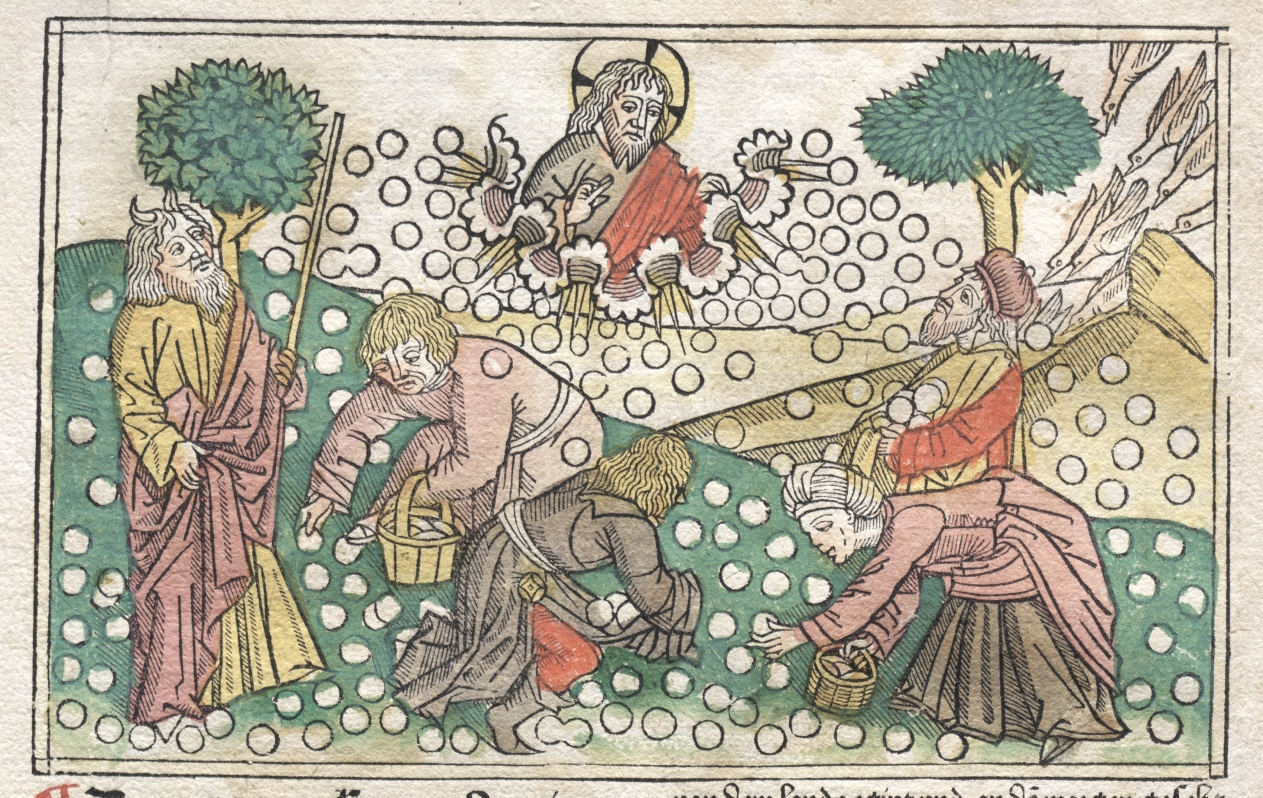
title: Nüremberg Bible: Manna Falling from Heaven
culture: Germany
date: 1400s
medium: woodcut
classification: Print